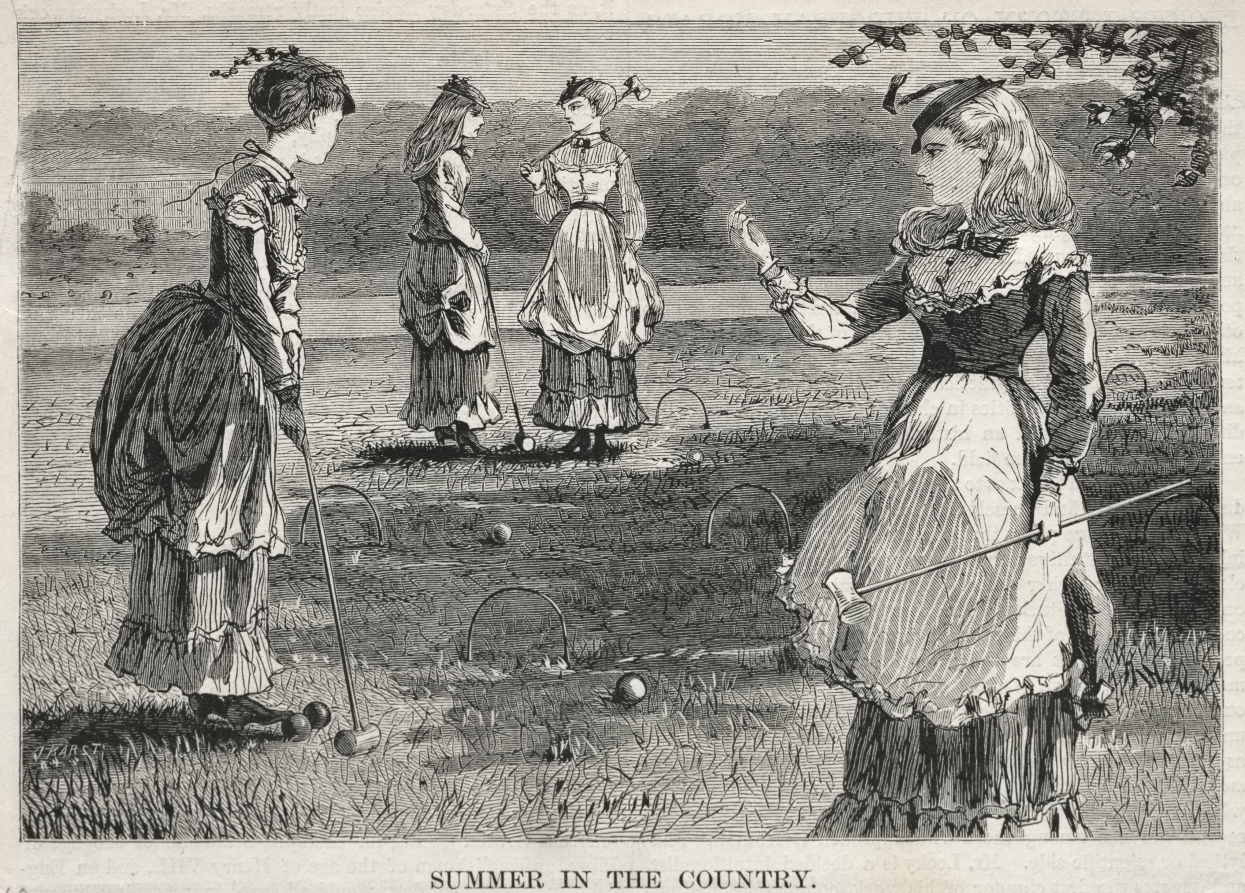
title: Summer in the Country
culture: America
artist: Winslow Homer (American, 1836–1910)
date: 1869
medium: wood engraving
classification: Print